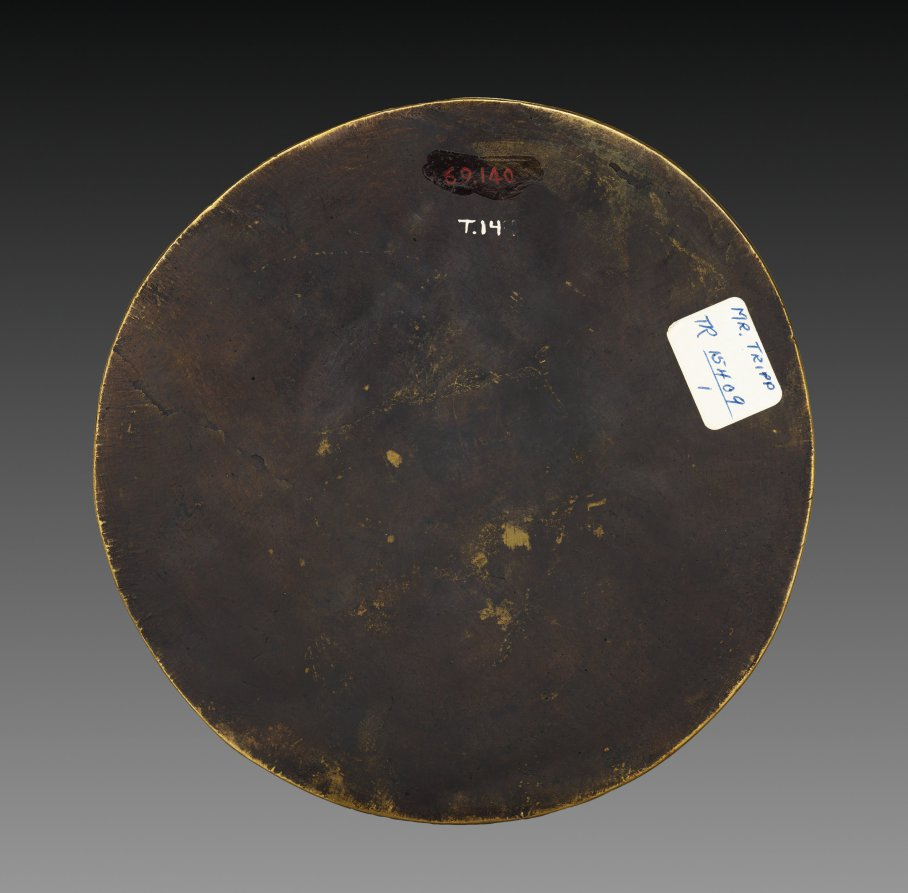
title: Circular Plaquette with Frieze of Mannerist Figures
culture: Italy, early 20th Century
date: c. 1900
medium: bronze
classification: Sculpture